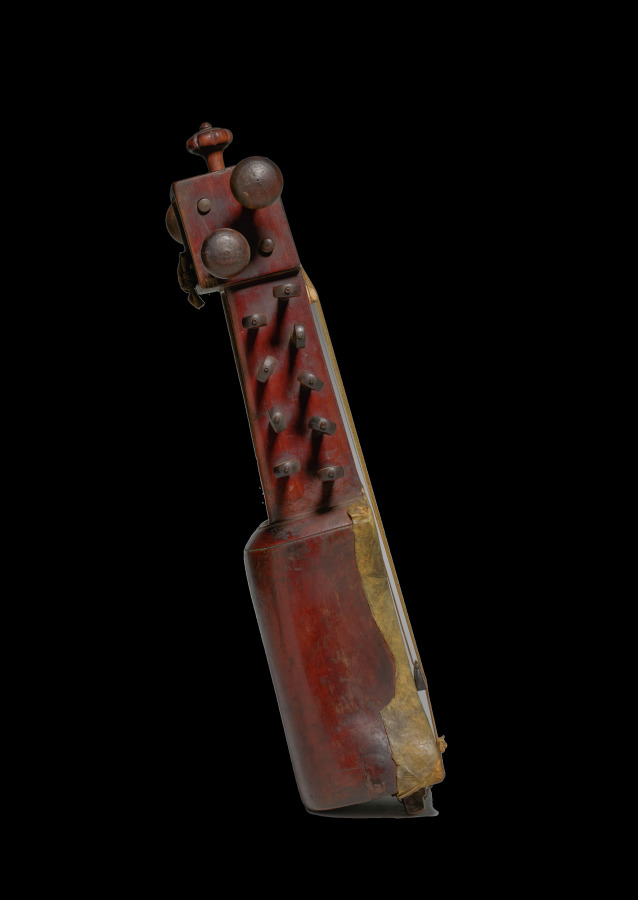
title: Sarangi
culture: East India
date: c. 1850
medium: Wood, parchment, bone or ivory, gut, and copper strings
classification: Musical Instrument